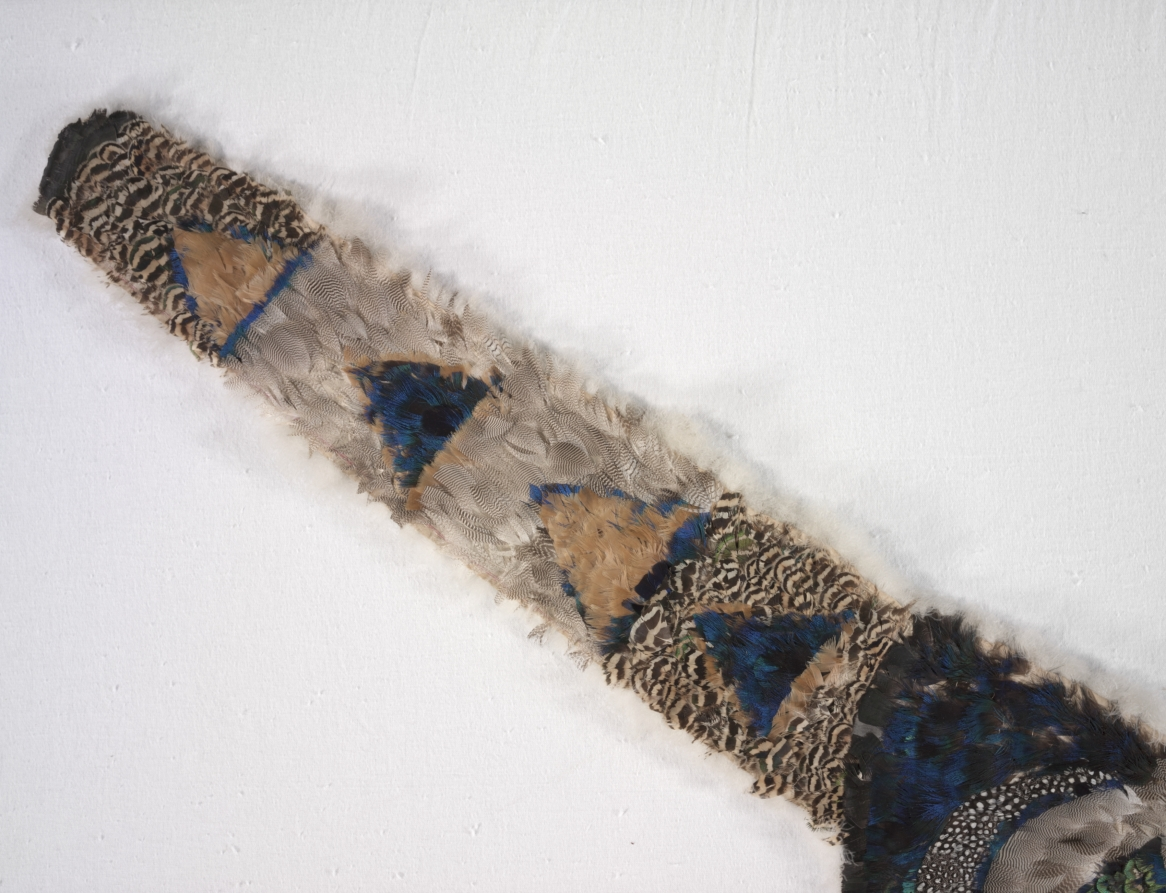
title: Pelerine (Collar or Cape)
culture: Northeastern Woodlands, Great Lakes/St. Lawrence River Region or Europe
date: c. 1830–1860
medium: Cotton, peacock feathers, guinea fowl feathers?, Gadwalls duck feathers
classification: Textile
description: Experts argue about collars of this type: Did a Great Lakes native artist make it, using as a model an English lady’s pelerine and exotic feathers obtained through trade? Or was the collar created by a European feather worker, perhaps after seeing the spectacular feather capes of native Hawaiian royals who visited England in 1824? There are arguments for both views—and for further research.